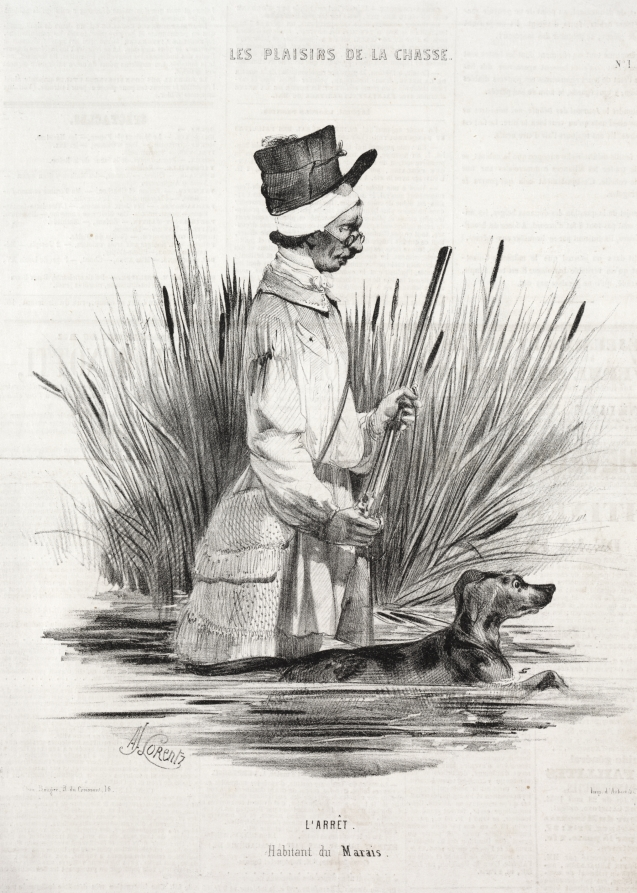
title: Les Plaisirs de la chasse: L'Arrêt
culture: France, 19th century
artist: Alade Joseph Lorentz (French, 1813-after 1858)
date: 1842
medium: lithograph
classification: Print